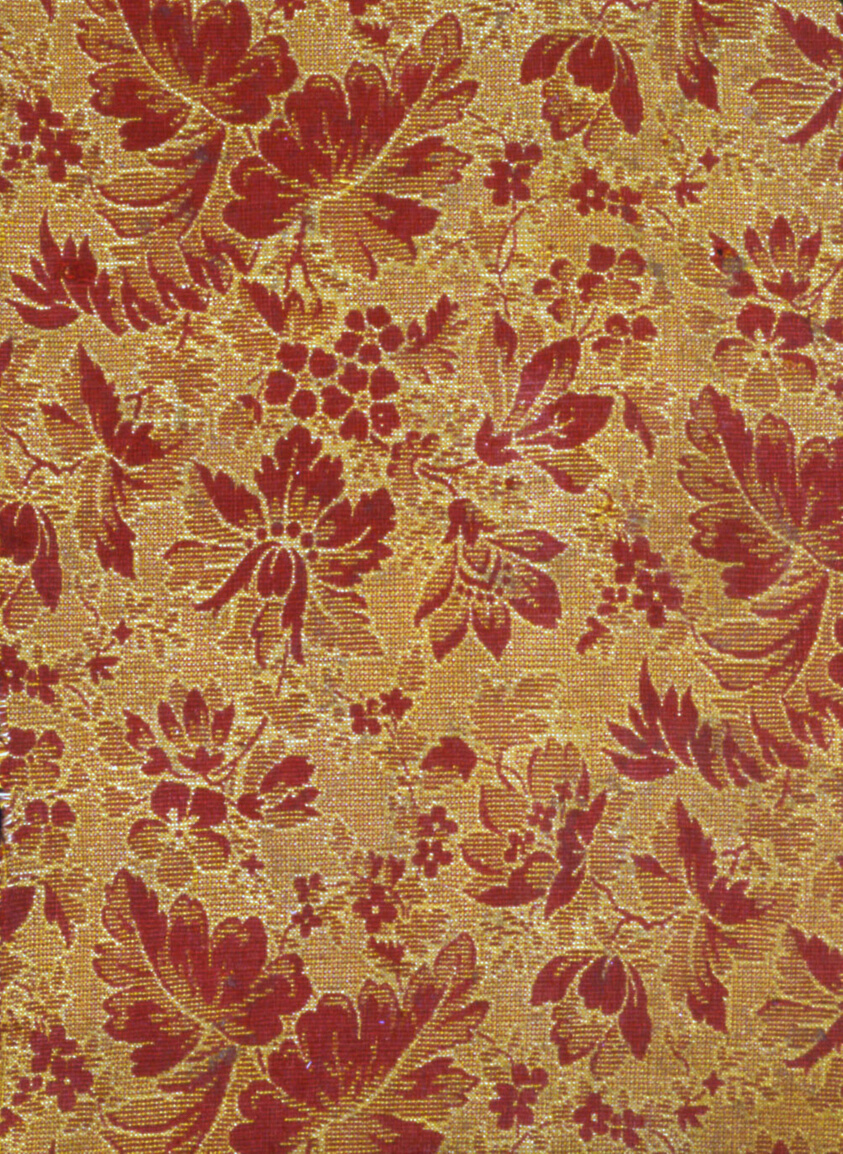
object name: Textile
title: Carpet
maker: United States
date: 1870/1900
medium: Wool, plain weave, tied and free double cloth; plain weave with plain interlacings of secondary binding warps and three-color complementary ground wefts; two loom widths joined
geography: United States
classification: weaving - carpet; textile